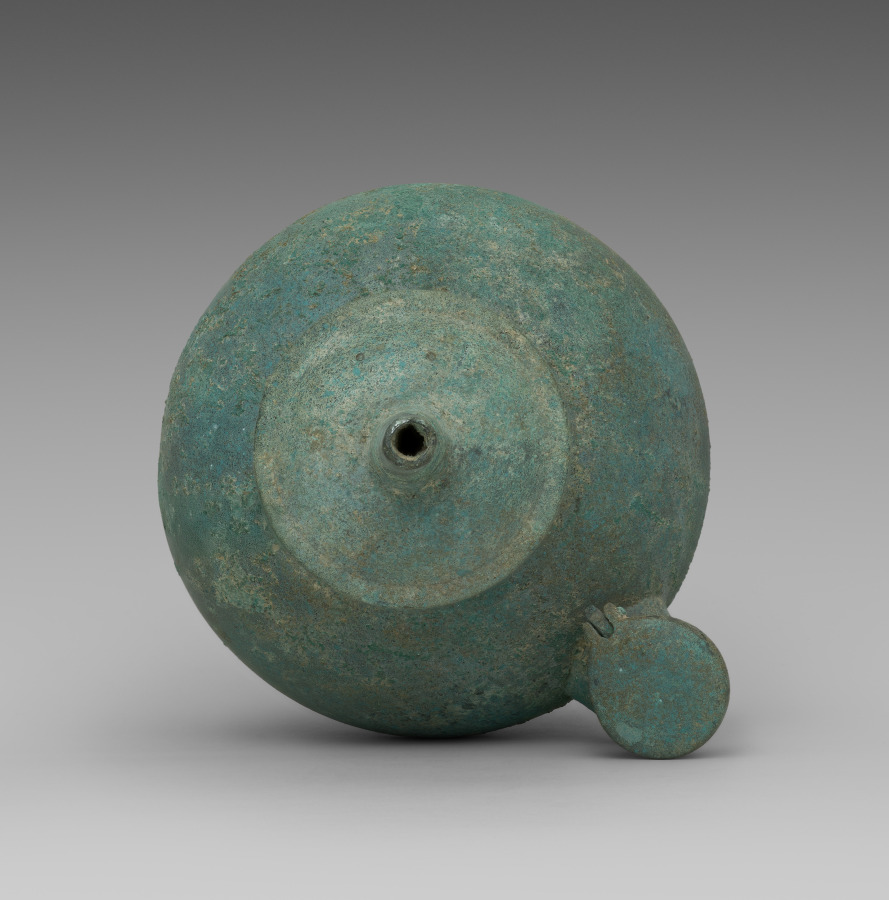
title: Water Ewer for Rituals (Kundika)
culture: Korea, Goryeo dynasty (918–1392)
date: 1100s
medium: bronze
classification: Metalwork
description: Known as kundika in Sanskrit, this distinctively shaped vessel served to purify a sacred space and to invoke a deity. In Korean Buddhist art, it appears primarily as an attribute of the Bodhisattva Avalokitesvara (Gwaneum in Korean). By the 1100s, however, the kundika was used as aristocrats’ fancy water container for everyday use.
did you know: This distinctively shaped vessel is called a kundika in Sanskrit, simply referring to a water bottle.